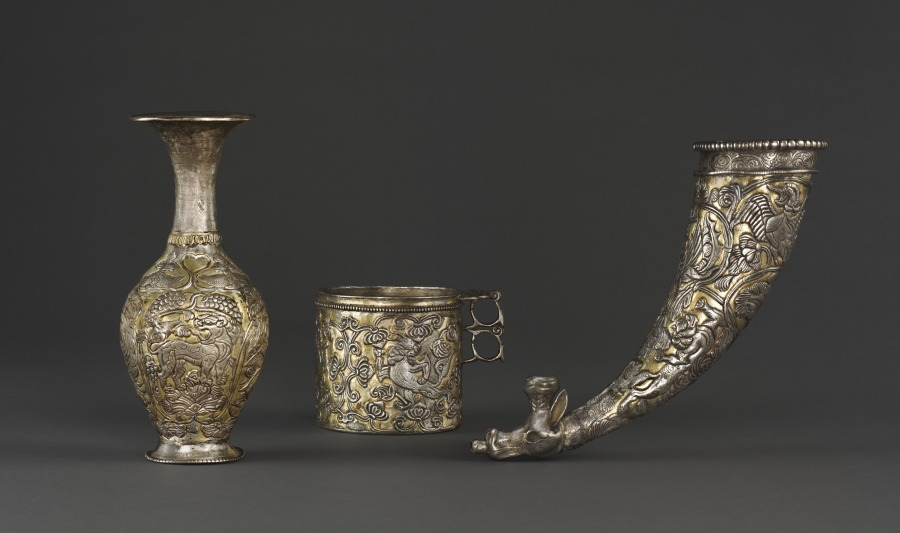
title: Silver Vessels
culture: Central Asia (Sogdiana) or Tibet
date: c. late 600s–early 700s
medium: Silver with gilded foil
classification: Silver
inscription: Inscribed on bottom of Cup (1988.67.2): phan shing gong skyes gui sug byad [or byang]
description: These vessels attest to the international climate that pervaded the regions of China, Tibet, and Central Asia during the time of the expansionist Tang dynasty (618–907). They are ornamented predominantly with Central Asian elements, including grape vines, beaded borders, heart-shaped motifs, and real and fantastic creatures. Stylistically, the Tibetan objects resemble the metalwork of Sogdian craftspeople, who came from the regions of modern-day Uzbekistan and Tajikistan and settled across Asia. These artists are known to have specialized in the technique of offsetting the silver repoussé design with gilded foil, using heat and pressure to adhere the foil to the silver surface of the vessel.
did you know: These banquet items may have been made specifically to be buried alongside a deceased person for use in the afterlife.